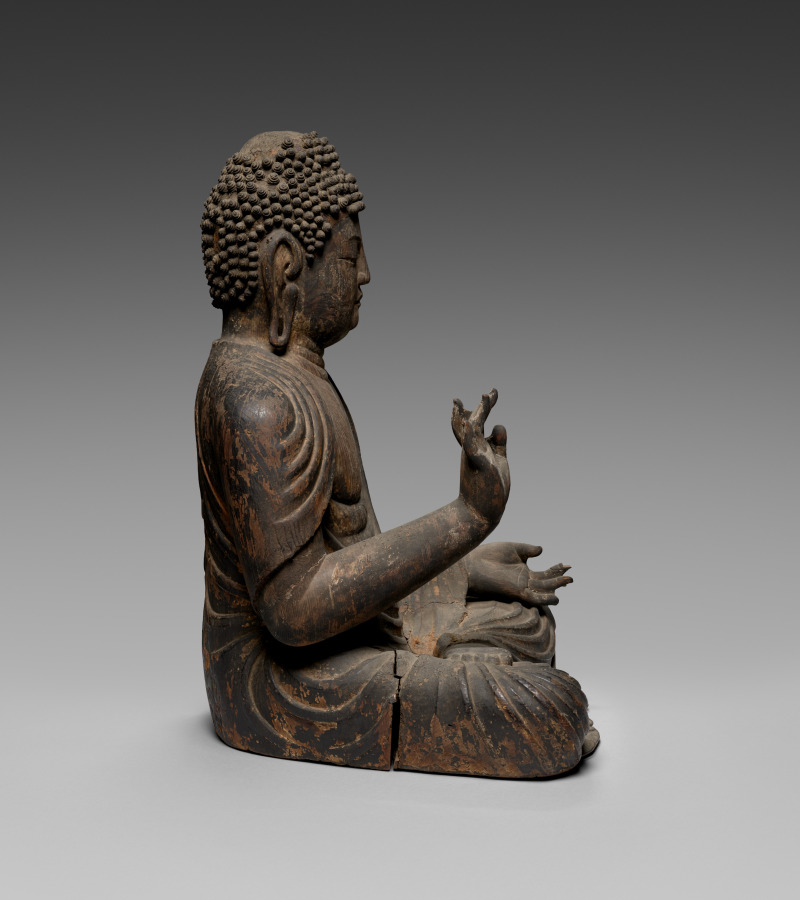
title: Shakyamuni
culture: Japan, Heian period (794–1185)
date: c. 900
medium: wood with lacquer and traces of color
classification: Sculpture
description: This image of Shakyamuni, the Buddha, or “awakened one,” who lived during the 500s or 400s BCE, is carved from one piece of wood. The distinctive pattern of thick, raised garment folds is characteristic of Japanese Buddhist sculpture of the 800s and 900s. Shakyamuni’s elongated ears and curled hair are among the physical attributes described in sacred texts that distinguish him as a Buddha.